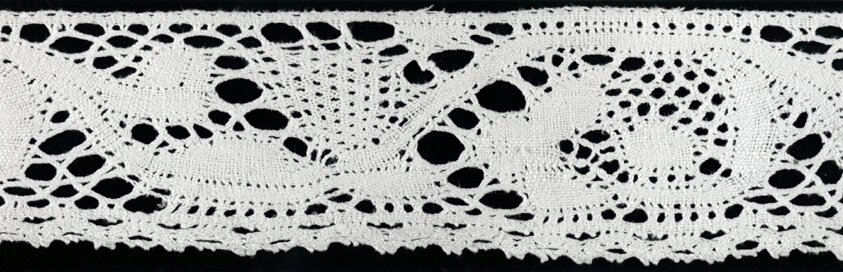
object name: Textile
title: Border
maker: Italy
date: 1750/1800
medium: Linen, bobbin straight lace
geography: Italy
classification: textile; lace - bobbin